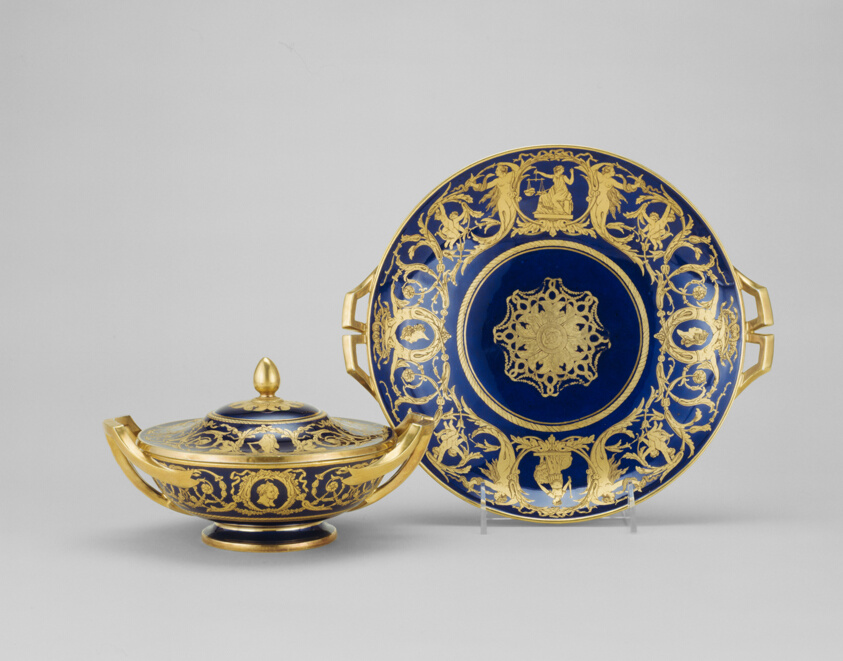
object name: Ceramics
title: Covered Bowl and Stand (Ecuelle de la toilette)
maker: Sèvres Porcelain Manufactory; French, founded 1740; Gilded by Nicolas-Pierre Pithou; French, active 1757-1817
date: 1784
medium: Hard-paste porcelain, underglaze dark blue ground, black enamel, and gilding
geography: Sèvres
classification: bowl; tableware; dish (vessel); ceramics; porcelain; european decorative arts